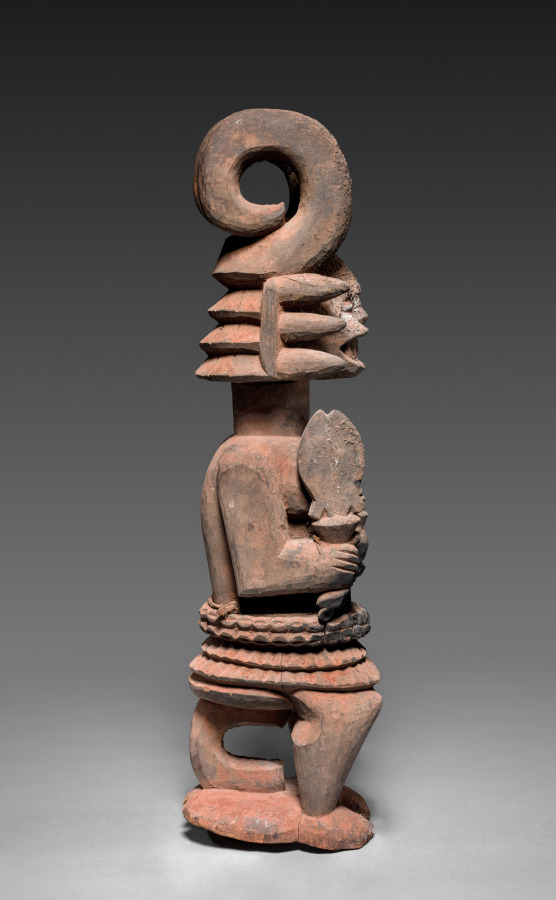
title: Shrine Figure (Ikenga)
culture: Africa, West Africa, Nigeria, Igbo carver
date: possibly early 1900s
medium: Wood, organic materials, and raffia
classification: Sculpture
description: This seated figure of a man holding a cutlass and an inverted human skull is a cult object called ikenga, associated with achievement and success. Standing at the center of a man’s personal shrine, the sculpture receives prayers and sacrifices in return for the ancestors’ guidance. An elaborate headdress comprising two horn-like extensions reinforces the cult’s preoccupation with masculinity, while facial incisions known as ichi refer to membership in one of many male associations.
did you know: This figure associated with achievement and success would have received prayers and sacrifices in return for the guidance of ancestors.